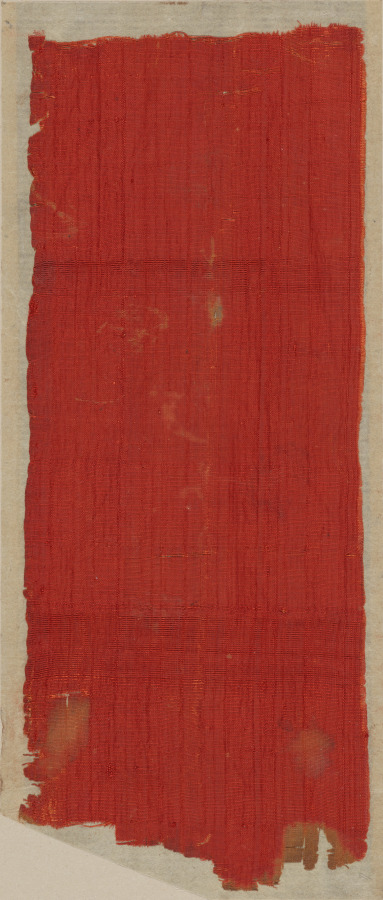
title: Fragment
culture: China or Japan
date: 700s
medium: tabby weave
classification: Textile